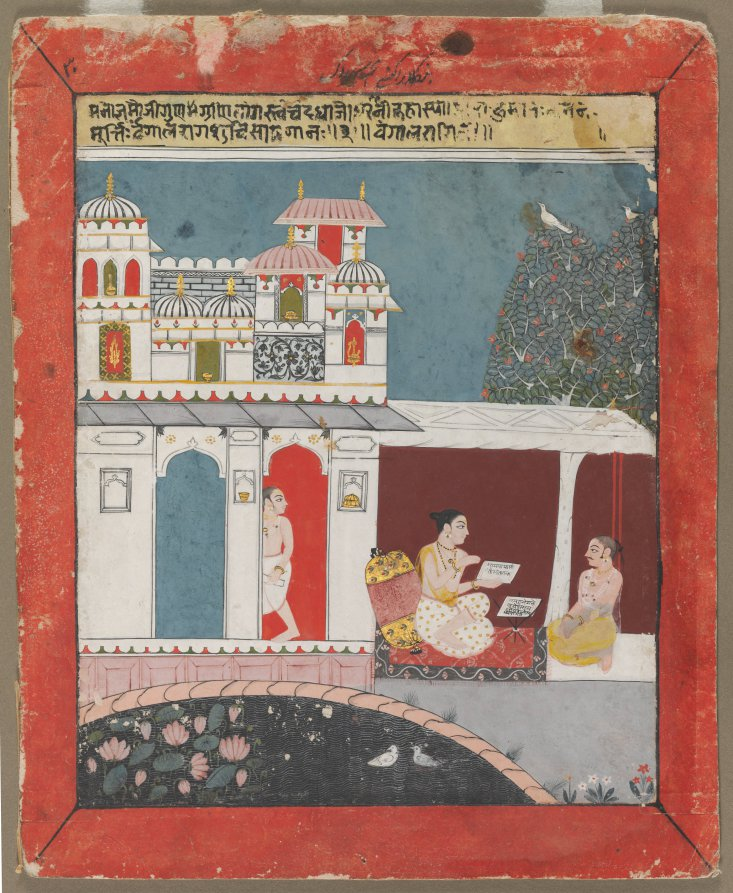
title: Bangala Ragini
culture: Central India, Rajasthan, Malwa school, 17th century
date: c. 1680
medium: ink and color on paper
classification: Painting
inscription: Inscription in Persian with title above panel of Hindi verse at top: "His body is decorated with a beautiful string of munja [grass]. He wears the skin of a young doe. He is a bell [vigorous] youth. His body shines with the brilliance of gold. He sings the sacred samau [hymn] -- Vangalaragini." The text before the teacher reads: "Rama Rama Sita Sita Rama [invoking the dieties Rama and Sita]/ The Ragini equals the thousandfold espression of the delight in Rama, / the delight of the mind ."